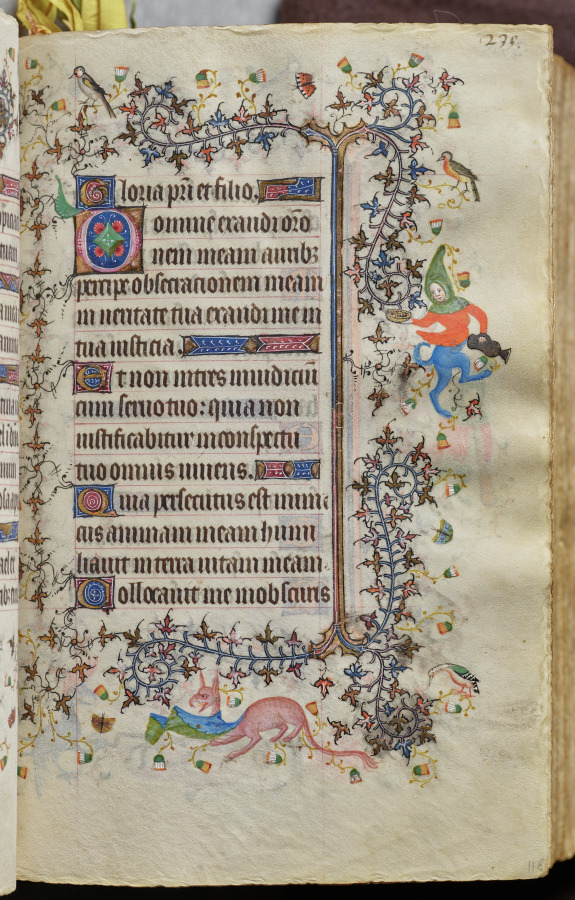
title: Hours of Charles the Noble, King of Navarre (1361-1425): fol. 118r, Text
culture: France, Paris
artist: Master of the Brussels Initials and Associates (French)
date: c. 1405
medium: ink, tempera, and gold on vellum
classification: Bound Volume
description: This precious volume was obviously highly prized by its owner, the French-born King of Navarre, who had his coat of arms painted on no less than twenty folios. Rather than directly commissioning this manuscript from a specific workshop, it seems that Charles the Noble acquired his book of hours -- perhaps ready-made for the luxury market -- while on a trip to Paris in 1404-05. A collaborative effort, six painting styles are evidenced within the pages of this codex, those of two Italians, two Frenchmen, and two Netherlanders. The painter who was responsible for the planning and decoration of the book, and who produced seventeen of the large miniatures, was a Bolognese artist known as the Master of the Brussels Initials. His principal assistant, responsible for most of the borders, was a Florentine who signed his name "Zecho" da Firenze on folio 208 verso.